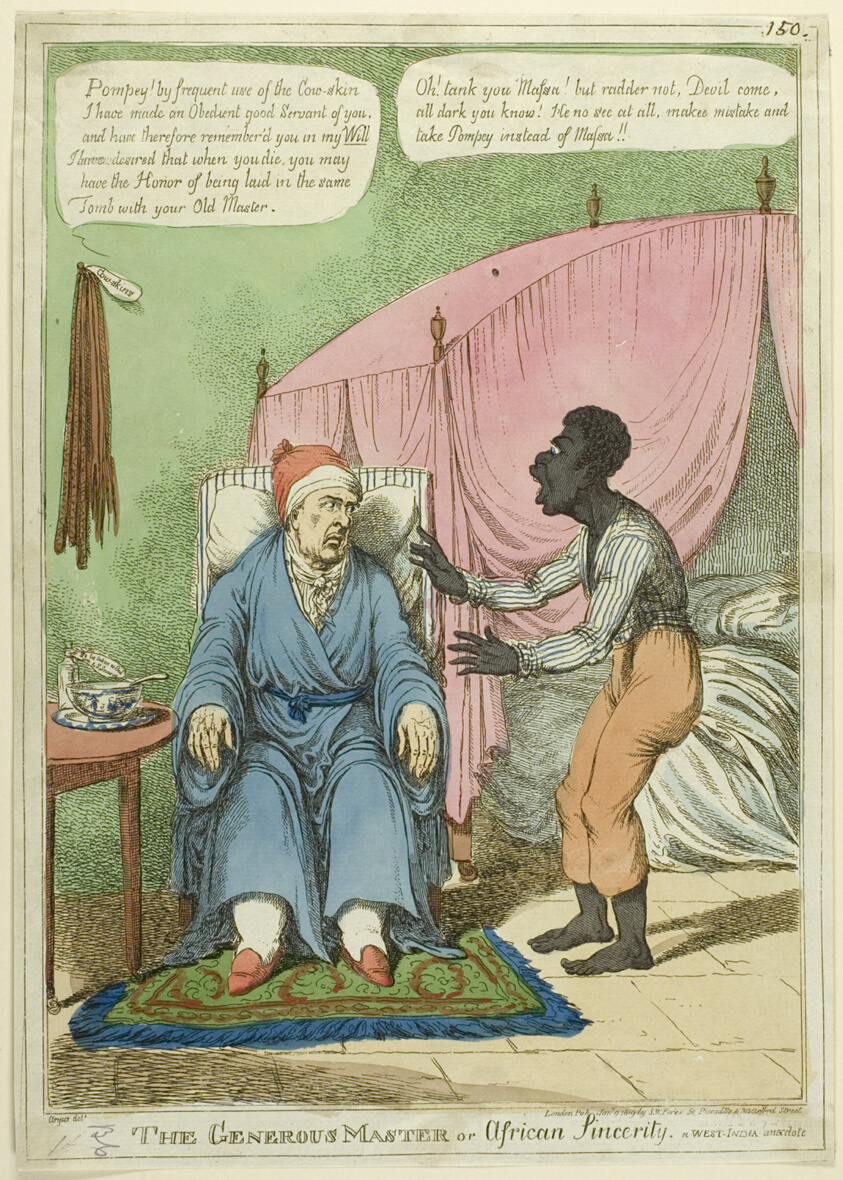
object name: Print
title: The Generous Master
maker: Charles Williams Argus (English, active 1797-1830); published by S.W. Fores (English, 1761-1838)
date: 1819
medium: Hand-colored etching on paper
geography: England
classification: etching; print; prints and drawing